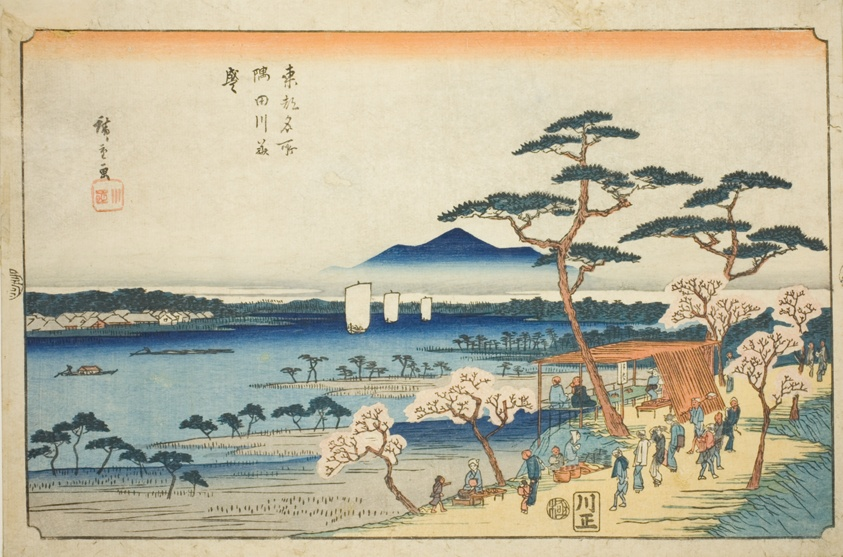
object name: Print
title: Cherry Blossoms in Full Bloom along the Sumida River (Sumidagawa hanazakari), from the series "Famous Places in the Eastern Capital (Toto meisho)"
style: Japanese (culture or style)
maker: Utagawa Hiroshige 歌川 広重; Japanese, 1797-1858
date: c. 1839/42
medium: Color woodblock print; oban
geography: Japan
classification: print; asian art